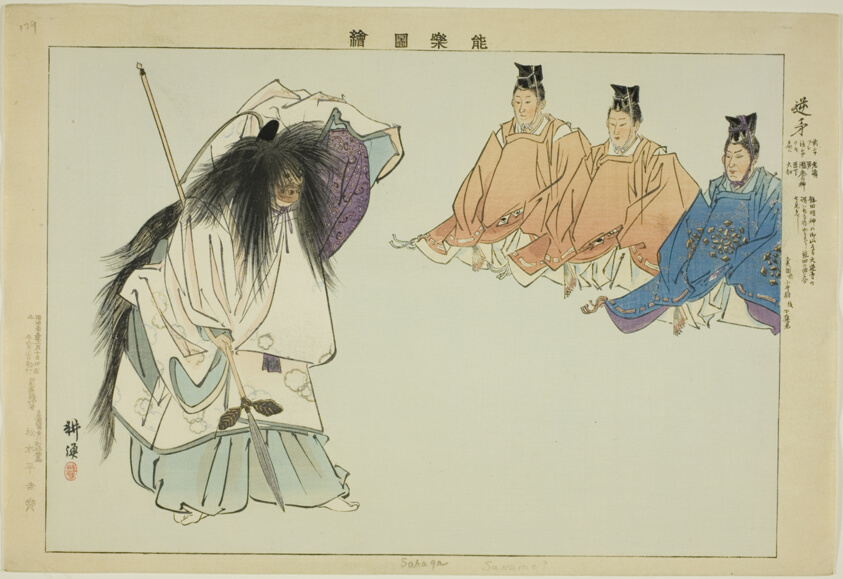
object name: Print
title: Sakaga, from the series "Pictures of No Performances (Nogaku Zue)"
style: Japanese (culture or style)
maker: Tsukioka Kogyo; Japanese, 1869-1927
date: 1898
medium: Color woodblock print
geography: Japan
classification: woodblock print; print; asian art